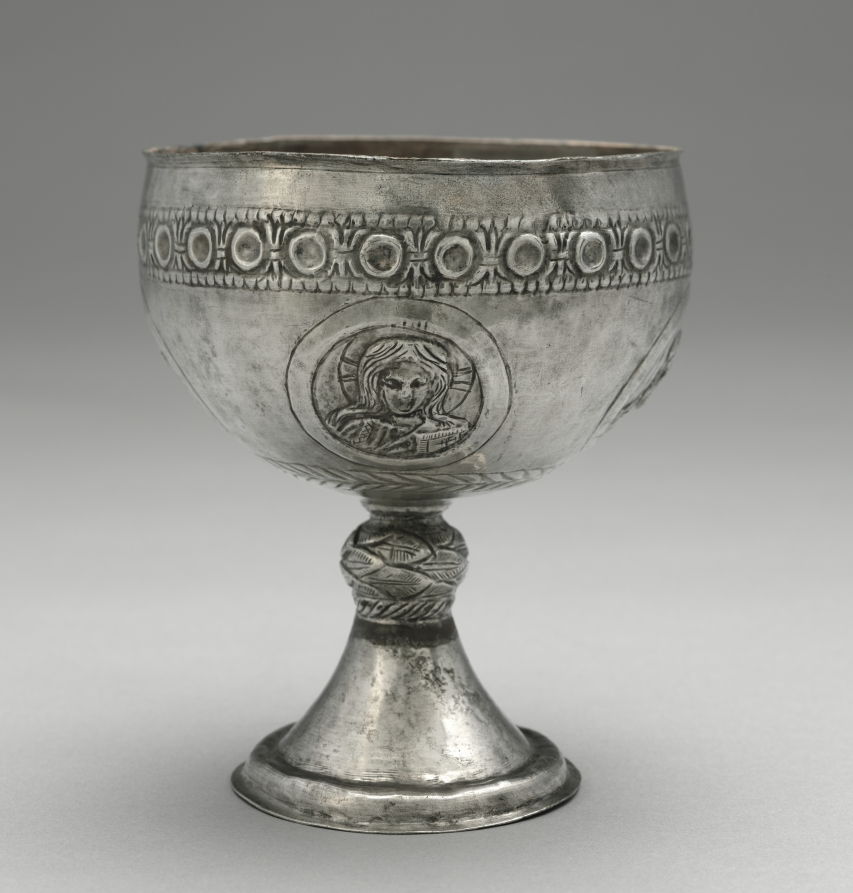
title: Chalice from the Beth Misona Treasure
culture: early Byzantium, Constantinople or Syria, Byzantine period, 6th-7th Century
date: c. 500–700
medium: silver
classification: Metalwork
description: These four liturgical silver vessels—a paten and three chalices (1950.378–81)—form what is now called the Beth Misona Treasure, named for the village in northern Syria for which the objects were made. While nothing is known about the exact location and circumstances of the treasure's discovery, the people of the village of Beth Misona were, like other Christian communities in Syria and Palestine, probably forced to bury their church silver to hide it from the Persians or Arabs, who conquered their lands in the first half of the 600s. The paten, which held pieces of Eucharistic bread used during Mass, is decorated with an engraved Latin cross surrounded by a dedicatory inscription that names the paten's donor—Domnos—and its original location, the church of Saint Sergios in Beth Misona. The chalices, which contained the Eucharistic wine used during Mass, feature broad cups decorated with portrait busts of Saints Peter and Paul, Christ, and the Virgin. One chalice bears a dedicatory inscription naming its donor—Kyriakos, Domnos's son—and the priest of the church that received the pious gift—Zeno.